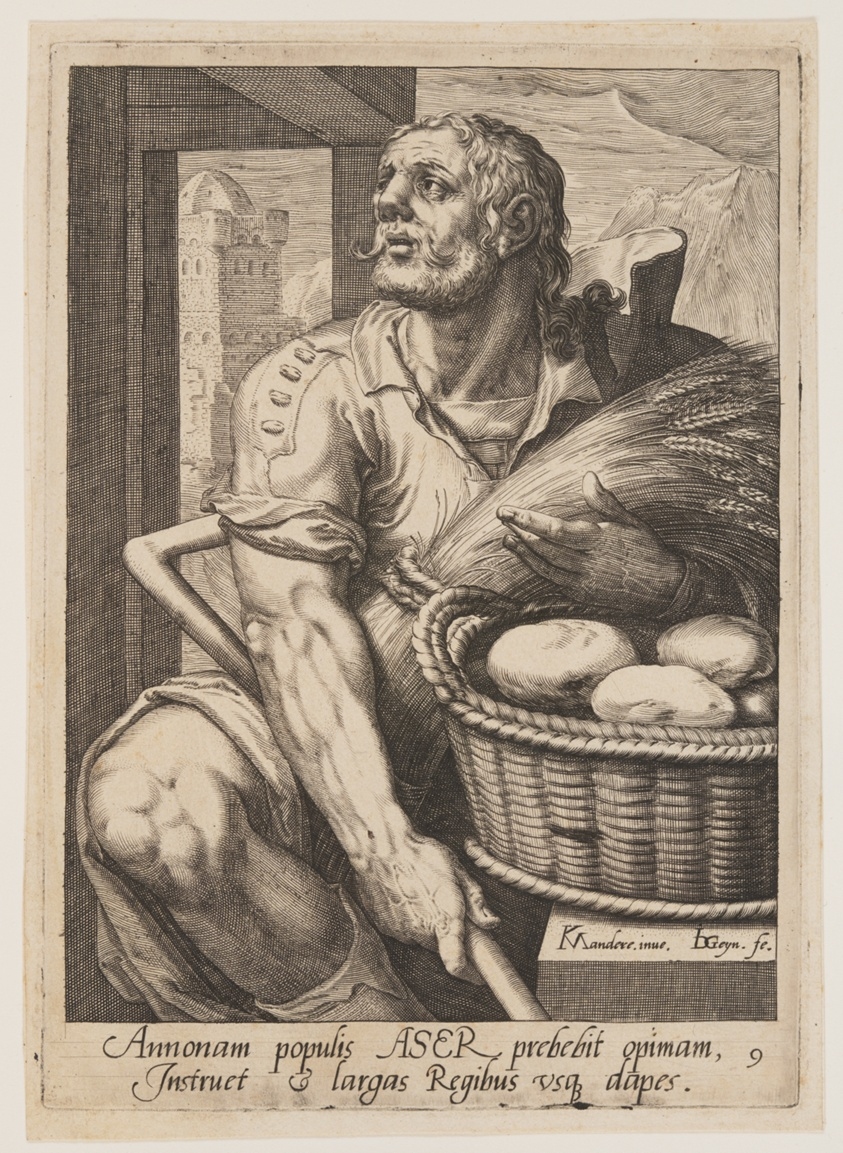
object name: Print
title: Asher, from The Twelve Sons of Jacob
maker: Jacques de Gheyn II (Dutch, 1565–1629); after Karel van Mander (Dutch, 1548–1606)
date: c. 1589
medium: Engraving on ivory laid paper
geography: Netherlands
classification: engraving; paper; print; prints and drawing